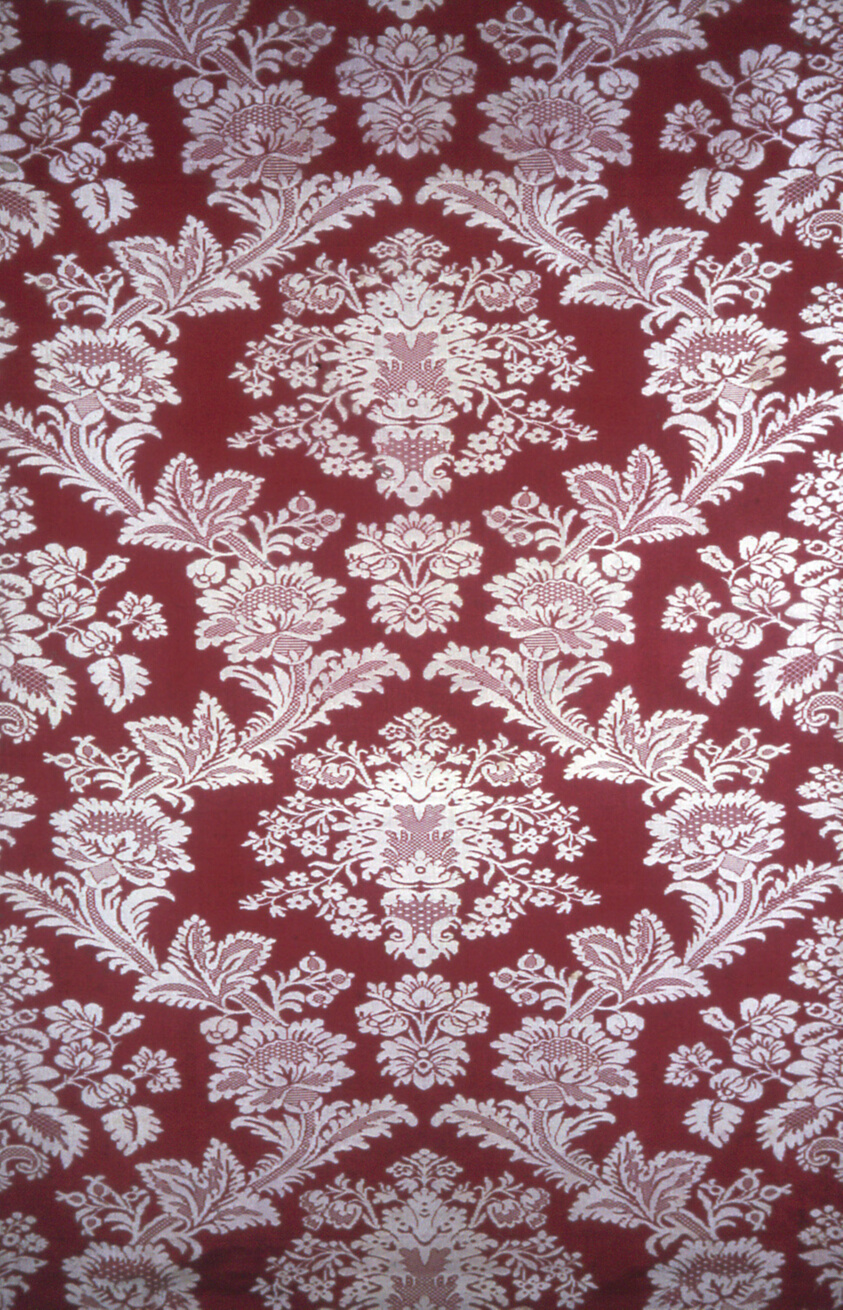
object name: Textile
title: Two Fragments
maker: France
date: c. 1730/40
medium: Silk, plain compound cloth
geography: France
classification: textile; weaving